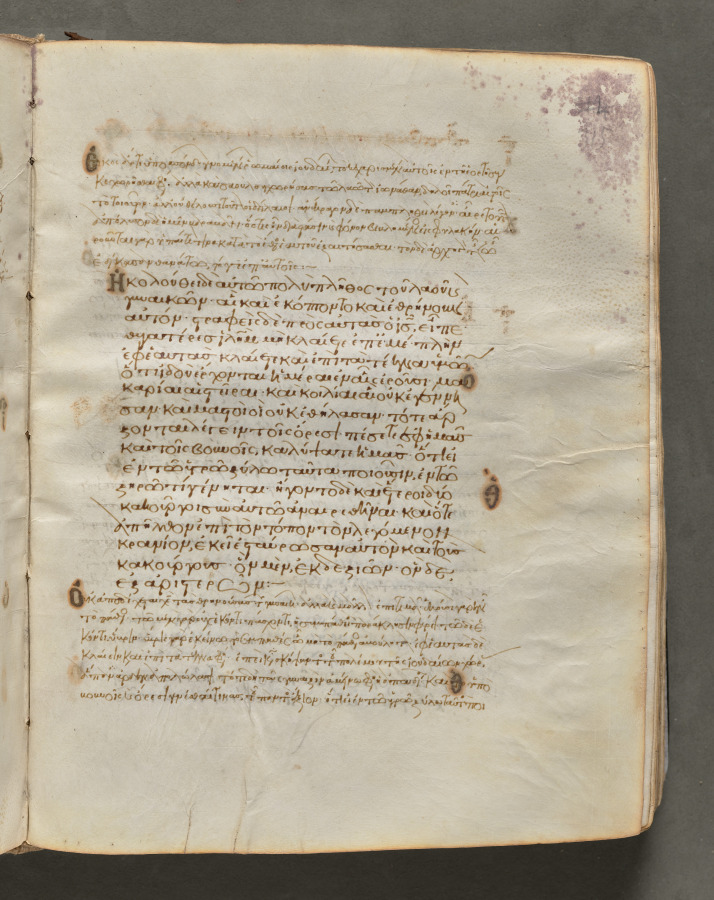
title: Text, folio 315 (recto), from a Gospel Book with Commentaries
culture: Byzantium, Constantinople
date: c. 1000–1100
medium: ink, tempera, and gold on vellum; leather binding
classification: Bound Volume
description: Each of the four gospels in this book opens on a page with brilliantly illuminated borders depicting the author of the text as well as birds—principally peacocks, symbols of the immortality of the soul—and fountains, representing the fountain of life and the salvation of the soul. This volume consists of 428 leaves with texts in Greek. Its level of sophistication suggests that it was probably written and decorated in a monastery in Constantinople.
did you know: Gospel books were carried in procession through Byzantine churches.